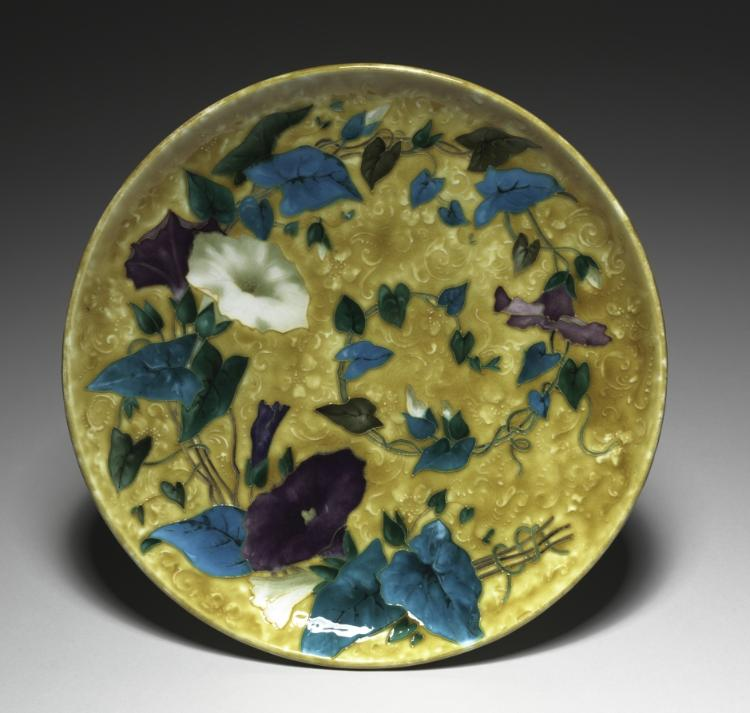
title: Plate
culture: France, 19th century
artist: Theodore Deck (French, 1823–1891)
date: c. 1880–1890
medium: earthenware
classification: Ceramic